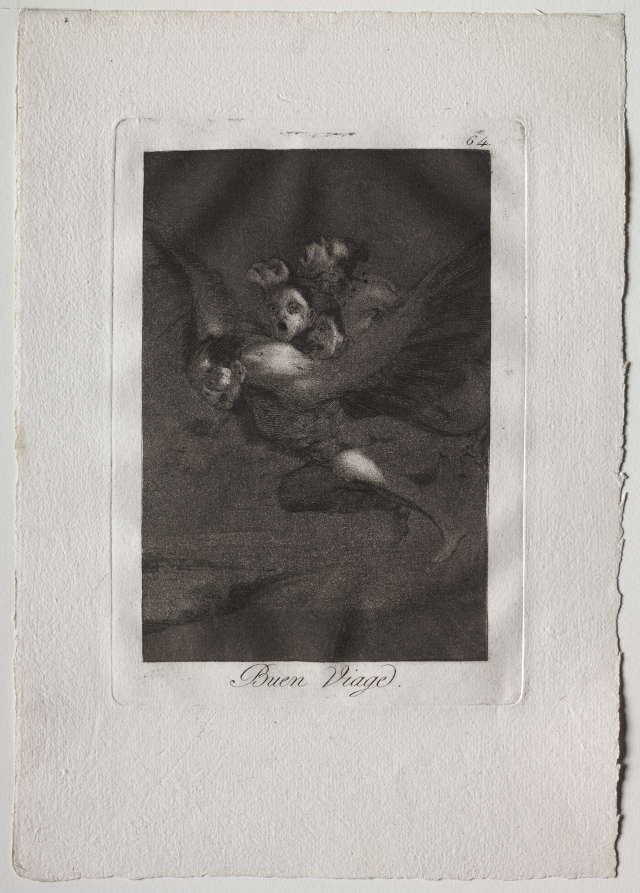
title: Bon Voyage, Plate 64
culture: Spain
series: Los Caprichos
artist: Francisco de Goya (Spanish, 1746–1828)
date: 1799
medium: etching and aquatint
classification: Print